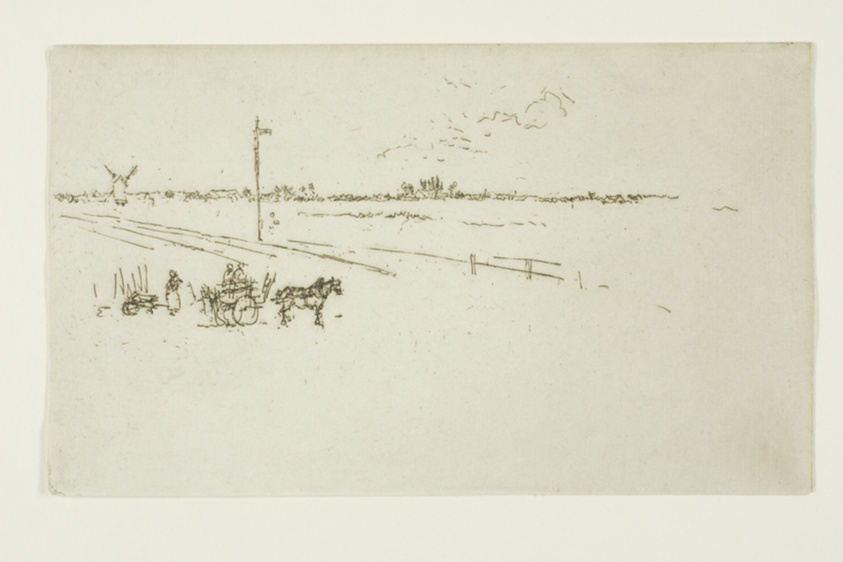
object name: Print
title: Railway-Station, Voves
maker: James McNeill Whistler (American, 1834-1903)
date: 1888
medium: Etching with foul biting in dark brown ink on ivory laid paper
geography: United States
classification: etching; foul biting; print; prints and drawing; paper